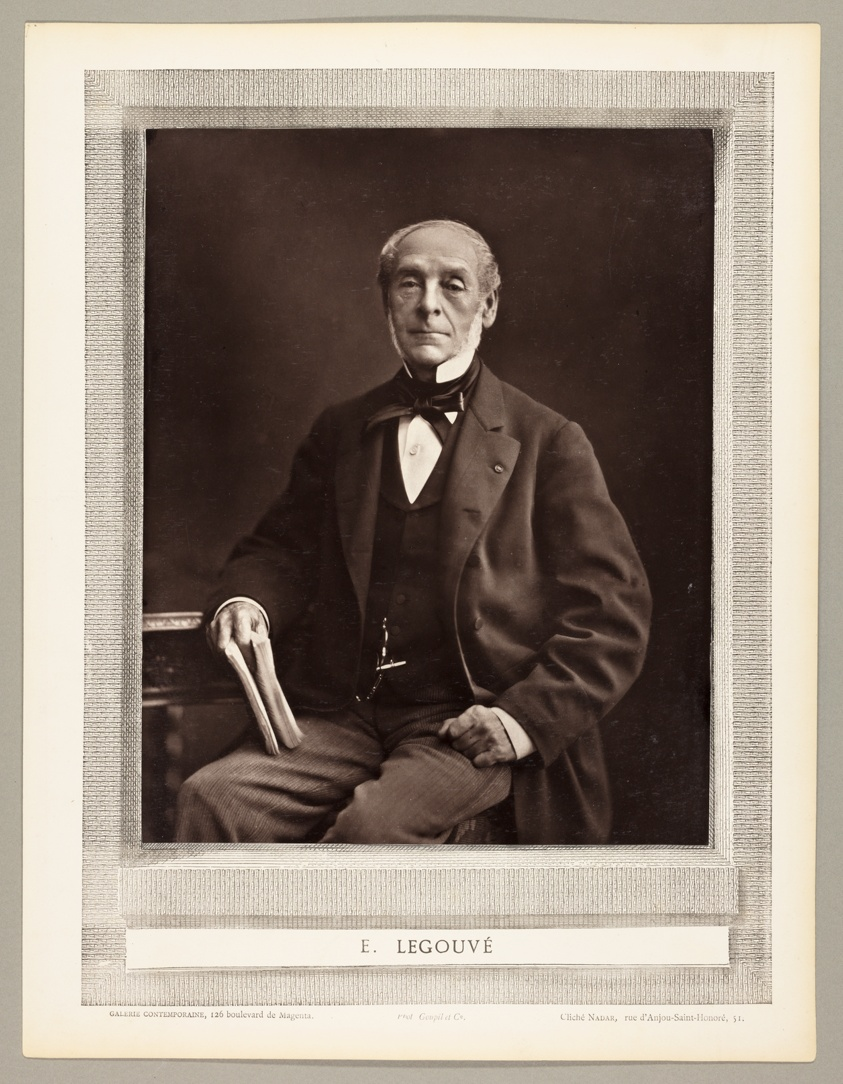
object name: Photograph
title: Ernest Legouvé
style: 19th century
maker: Nadar (Gaspard Félix Tournachon) (French, 1820–1910)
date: 1853/76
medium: Woodburytype, from the periodical “Galerie Contemporaine Littéraire, Artistique” (1876), volume 3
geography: France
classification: woodburytype; photomechanical process; photography; photograph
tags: Collected by Hugh Edwards, Contemporaine Littéraire